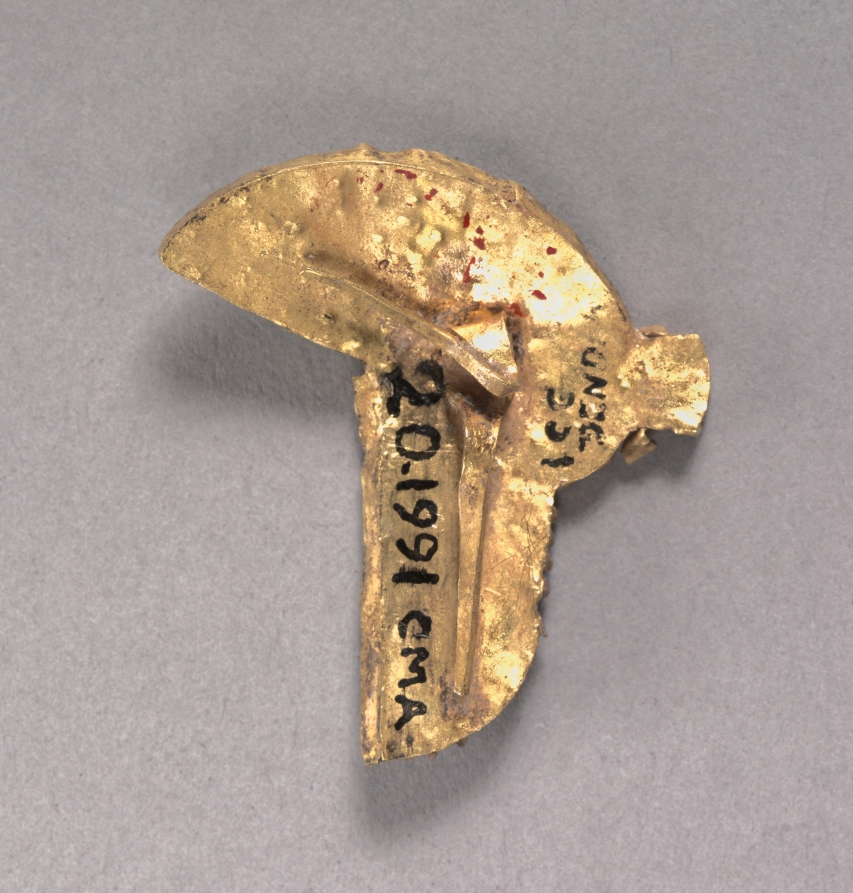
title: Vulture Headdress Inlay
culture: Egypt, Greco-Roman period (332 BCE–395 CE), Ptolemaic dynasty (305–30 BCE)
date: 100–1 BCE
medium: gold and semi-precious stones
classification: Jewelry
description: The vulture headdress was worn by goddesses and queens. This inlay in the form of a vulture headdress has more than 100 stones: lapis lazuli (dark blue), turquoise (light blue), petrified wood (red), and an unidentified white stone painstakingly cut to shape and separated by thin plates of gold. Body, wing, and tail feathers are carefully distinguished in minute detail.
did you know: When creating this headdress, artisans used numerous semiprecious stones with inset partitions to keep them separate. To ensure that the stones would stay in place, a resin-like material was used as an adhesive.